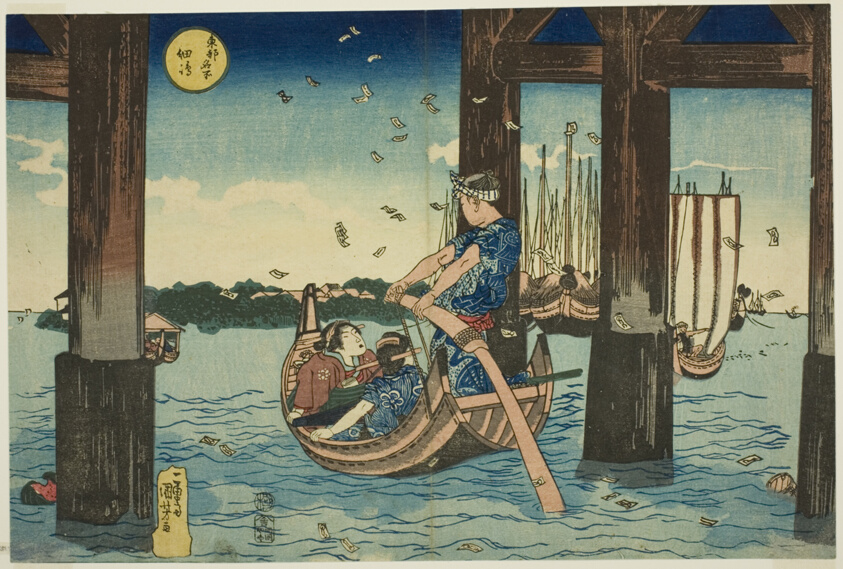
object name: Print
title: Tsukuda Island (Tsukudajima), from the series "Famous Places in the Eastern Capital (Toto meisho)"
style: Japanese (culture or style)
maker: Utagawa Kuniyoshi (Japanese, 1797-1861)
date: c. 1832/33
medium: Color woodblock print; oban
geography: Japan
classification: woodblock print; print; asian art